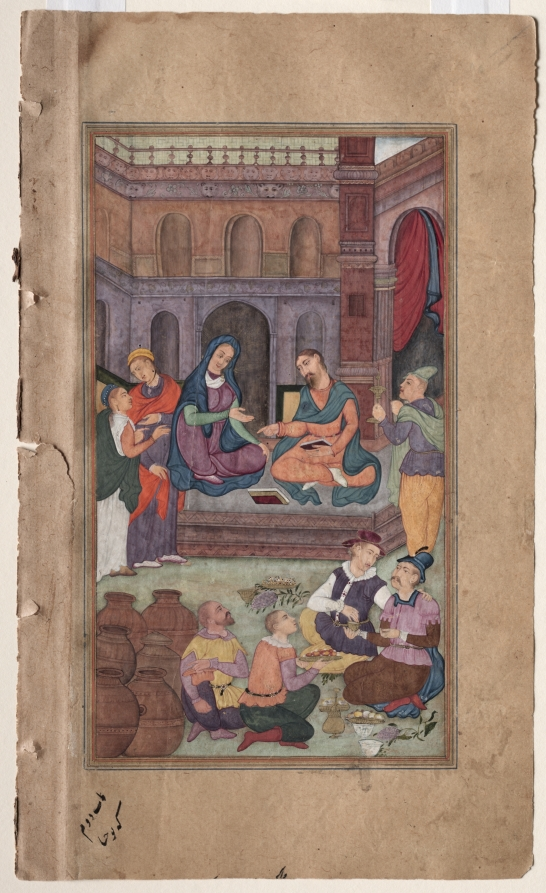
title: The Marriage at Cana (folio 58 verso), from a Mirror of Holiness (Mir’at al-quds) of Father Jerome Xavier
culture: Mughal India, Allahabad, made for Prince Salim (1569–1627)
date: 1602–4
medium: Gum tempera, ink, color, and gold on paper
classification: Manuscript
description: Mary and Jesus sit in places of honor at the wedding of her relatives in Cana in front of a building facade ornamented at the top with charming rows of animal faces. The text specifies that there were six water jars at the gathering, as depicted in the lower left. The wine master in the yellow tunic gestures to the jars, as he admonishes the host for saving the good wine for last. The dumbstruck host, who knew there was no more wine, has discovered that Jesus miraculously transformed the water into wine. The figure wearing the crimson velvet hat with his hand on the host’s shoulder is probably the groom. The miracle inspired him to leave his bride a virgin and follow Christ as the apostle John.